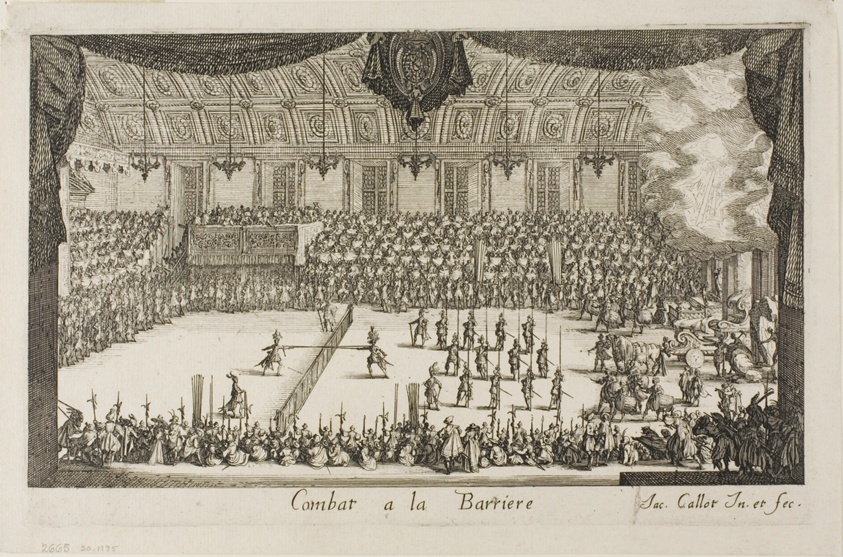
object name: Print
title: The Grand Tournament: The Combat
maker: Jacques Callot (French, 1592-1635)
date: 1627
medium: Etching in black on ivory laid paper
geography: France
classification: print; prints and drawing